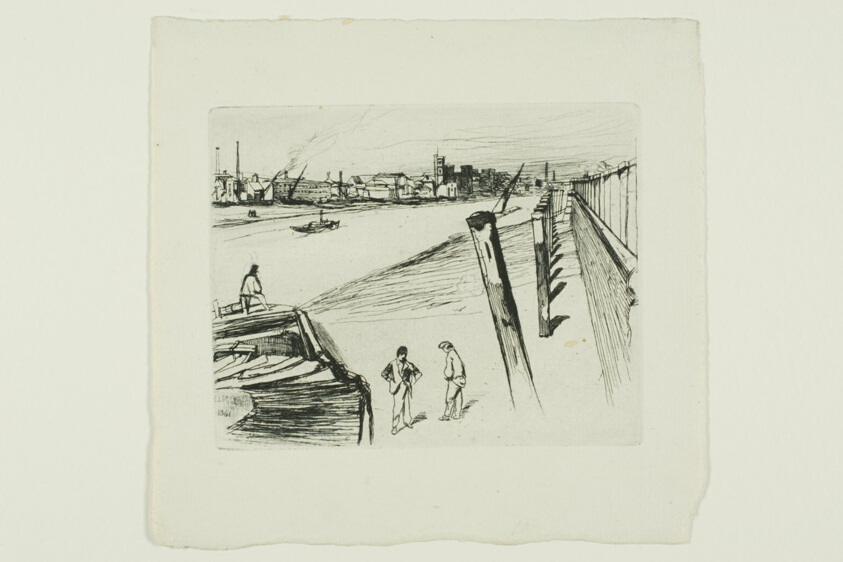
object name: Print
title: Millbank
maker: James McNeill Whistler (American, 1834-1903)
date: 1861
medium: Etching and drypoint with foul biting in black ink on cream laid paper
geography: United States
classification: etching; foul biting; print; prints and drawing; paper; drypoint